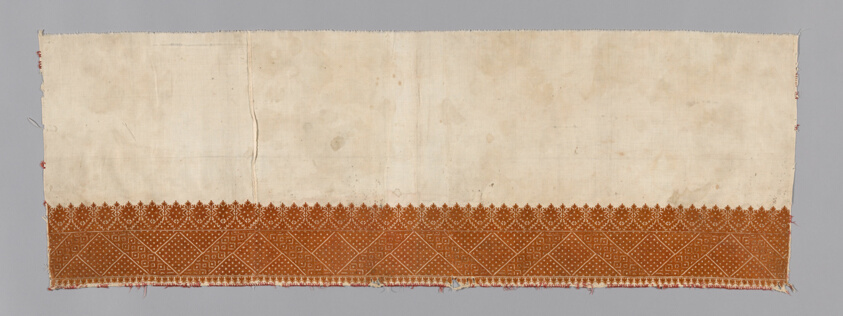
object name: Textile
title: Fragment (Border)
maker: Russia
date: 19th century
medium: Cotton, plain weave; embroidered with silk floss in back, Bosnian, chained border, double running, hem, satin, and single faggot stitches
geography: Russia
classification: textile; needlework (visual works)